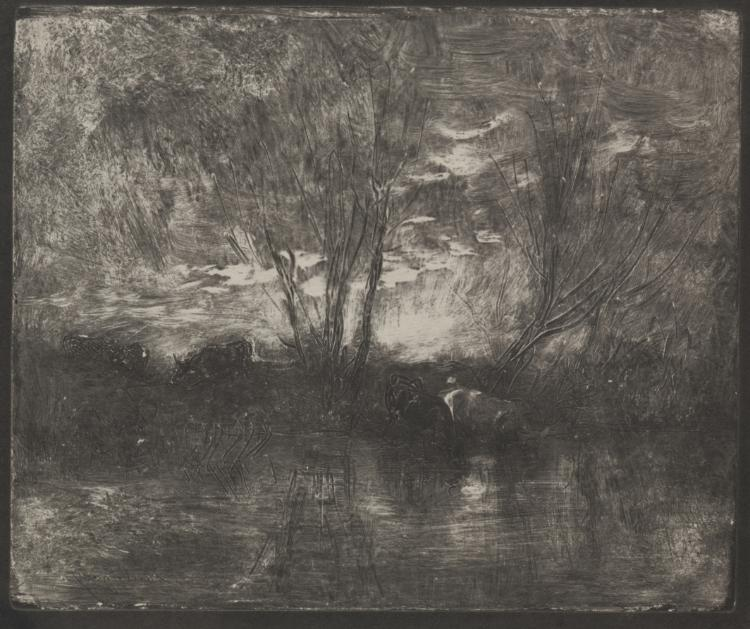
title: Cows at a Watering Place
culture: France, 19th century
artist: Charles François Daubigny (French, 1817–1878)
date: original impression 1862, printed in 1921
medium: cliché-verre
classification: Print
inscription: signed, lower left, in glass plate: Daubigny